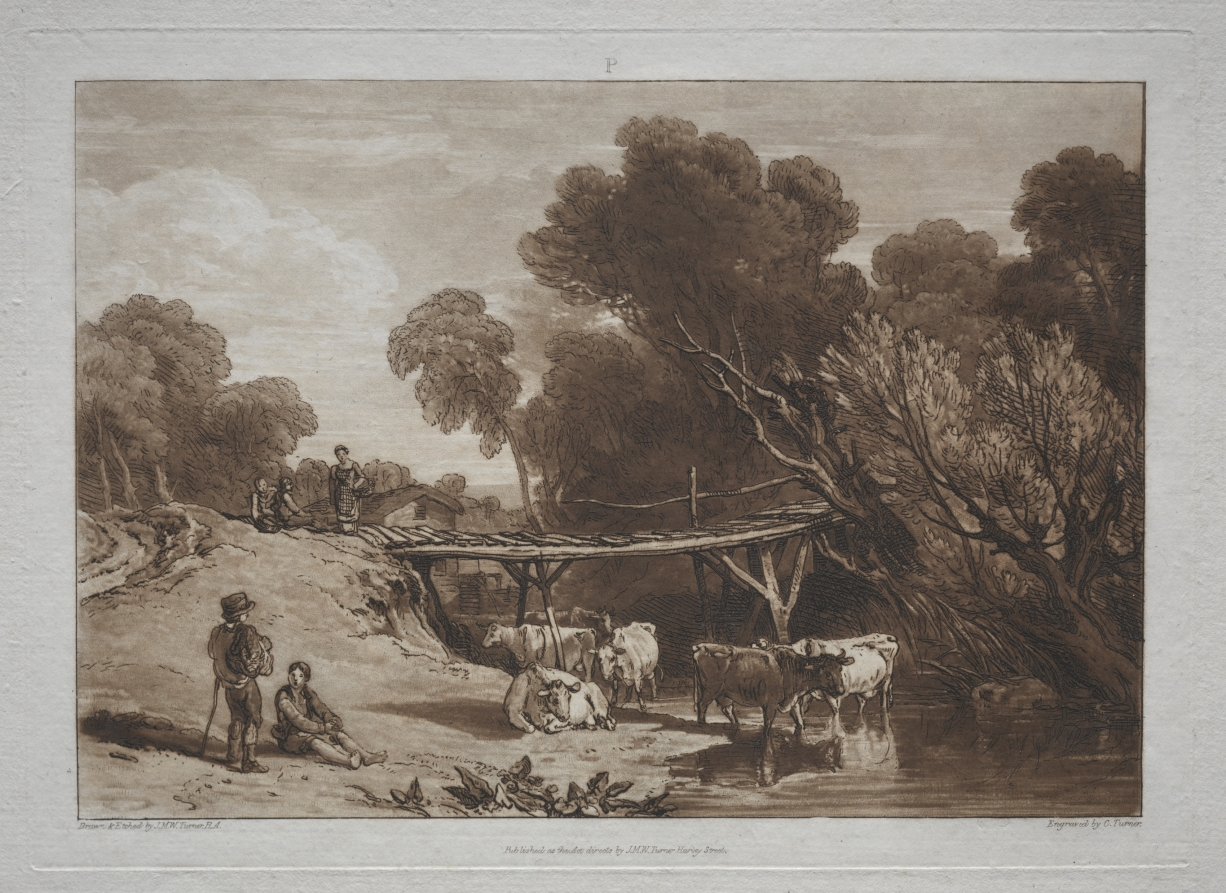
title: Liber Studiorum: The Bridge and Cows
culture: England, 19th century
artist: Joseph Mallord William Turner (British, 1775–1851)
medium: etching and mezzotint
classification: Print